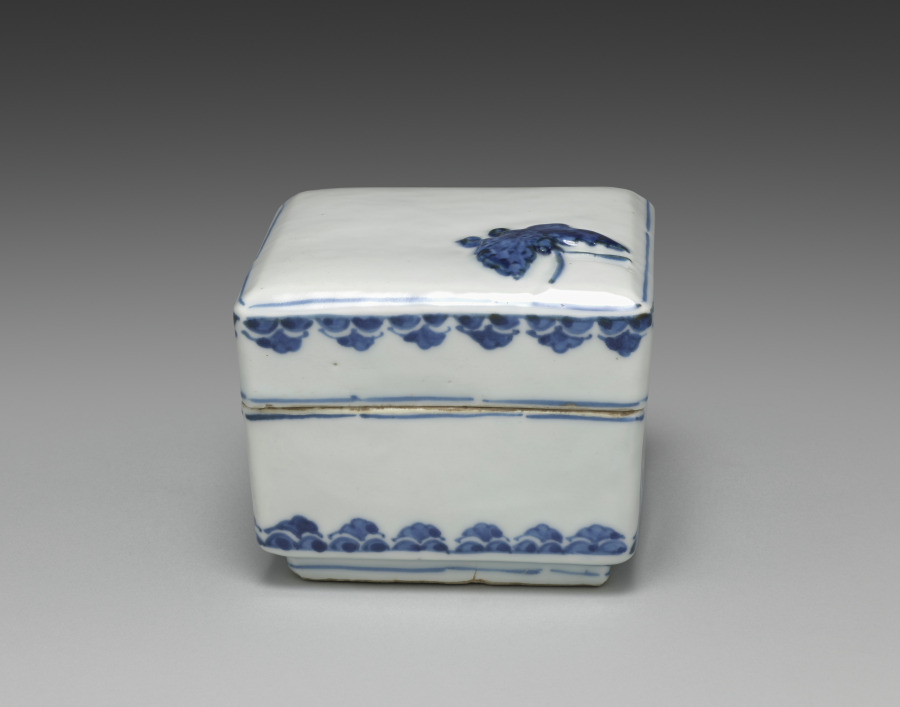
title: Box with Butterfly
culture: Japan, Meiji period (1868–1912)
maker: Seifū Yohei I (Japanese, 1801–1861)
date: 1855–57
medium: Porcelain with underglaze blue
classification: Ceramic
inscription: 清風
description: This sturdy box, with comparatively thick walls and resulting heft, is sparsely decorated with a single butterfly motif in dark underglaze blue cobalt in one corner of the lid and with repeating floral patterns along the lid and base. Single broken lines of underglaze blue define the edge of the box lid’s top where it curves to meet the sides and again where it meets the base of the box. Another blue band runs around the upper rim of the base where it meets the lip, left unglazed for a better grip of the lid when the box is closed. Yohei I’s signature on the center of the recessed base is set within a wide blue square. The porcelain box is meant to call to mind a famous story attributed to Zhuang Zhou (c. 369–286 BCE), also known as Master Zhuang, or Zhuangzi, pronounced Soji in Japanese. The second chapter of Zhuangzi, his eponymous collection of anecdotes, records the story as follows: Once, Zhuang Zhou dreamt he was a butterfly, a butterfly flitting and fluttering about, happy with himself and doing as he pleased. He didn’t know that he was Zhuang Zhou. Suddenly, he woke up and there he was, solid and unmistakable Zhuang Zhou. But he didn’t know if he was Zhuang Zhou who had dreamt he was a butterfly, or a butterfly dreaming that he was Zhuang Zhou. Between Zhuang Zhou and the butterfly there must be some distinction! This is called the Transformation of Things. The lidded box resembles kosometsuke, the porcelains in underglaze blue made to order or on speculation for the Japanese market during the early to mid-1600s in Jingdezhen, China. These works were often made from designs submitted by Japanese clients, many of whom were masters of chanoyu, who sought the wares for their tea practice. The relative roughness of the clay and the distortions in the fired object were intentional, as they created the rustic effect desired by Japanese tea communities.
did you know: It is possible that the model for this box was a smaller lidded box meant for storing incense.